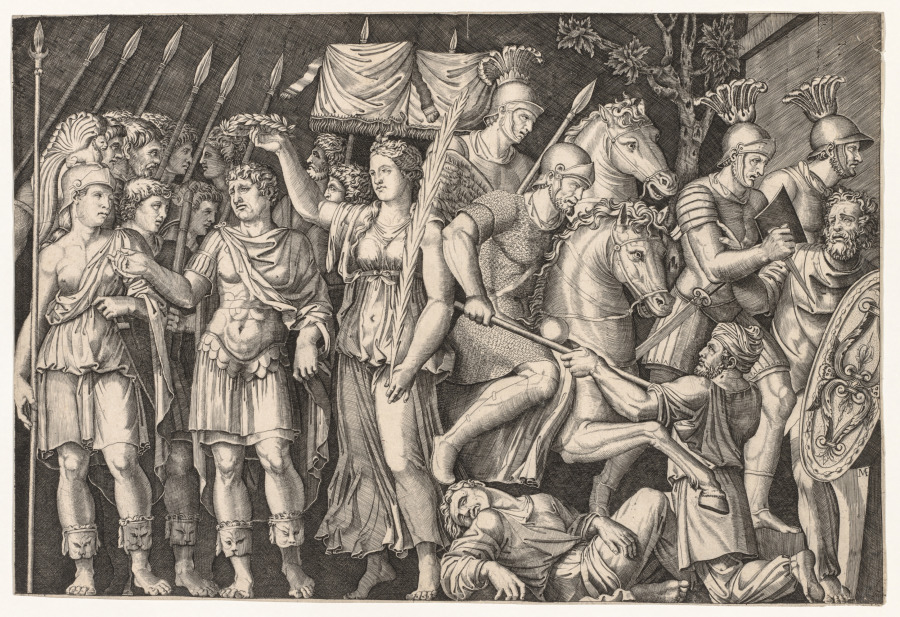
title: Speculum Romanae Magnificentiae: Trajan Between City of Victory and Rome (The Emperor Trajan)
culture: Italy, 16th century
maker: Unknown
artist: copy after Marcantonio Raimondi (Italian, 1470/82–1527/34)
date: c. 1530–34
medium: engraving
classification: Print